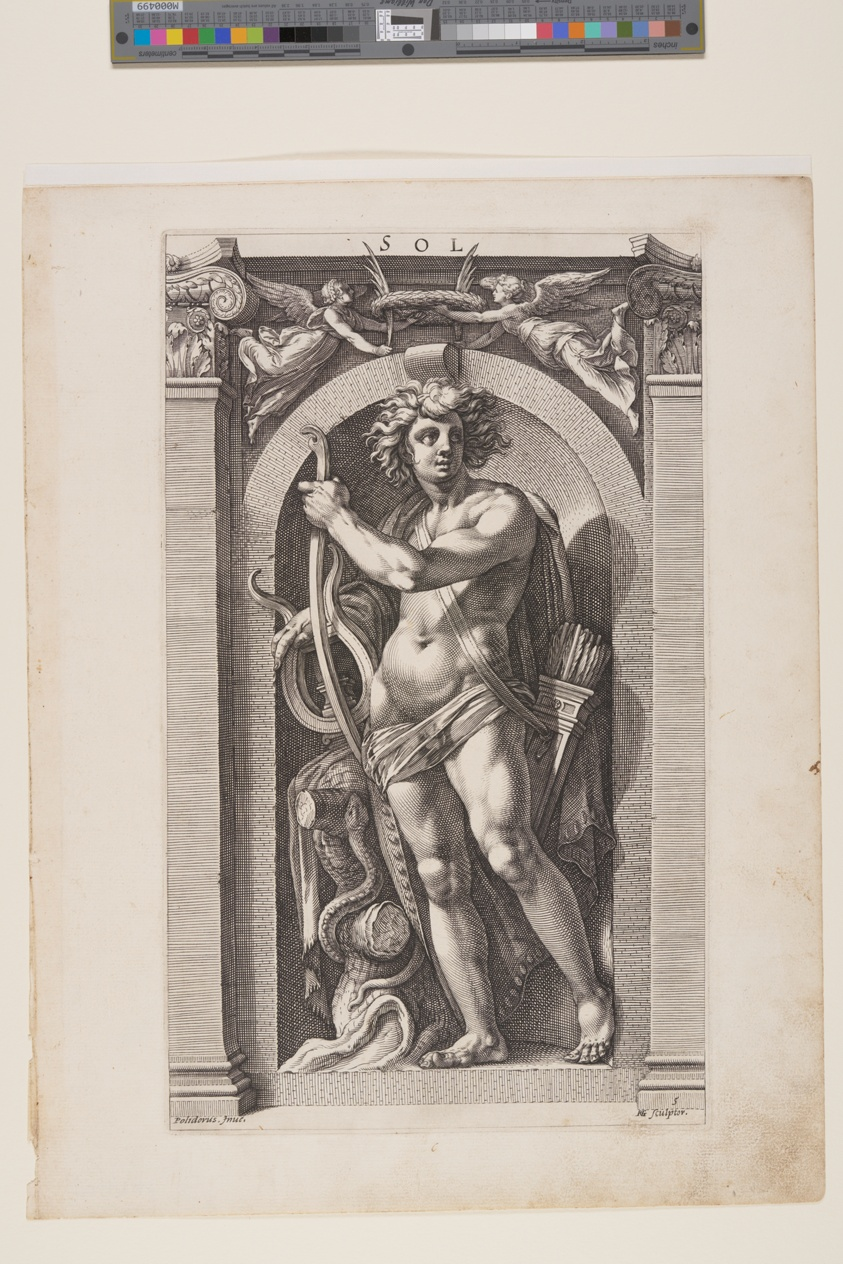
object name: Print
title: Sol, from Eight Pagan Gods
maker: Hendrick Goltzius (Dutch, 1558–1617); after Polidoro da Caravaggio (Italian, c. 1499–c. 1543)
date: 1592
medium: Engraving on ivory laid paper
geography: Netherlands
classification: print; paper; prints and drawing; engraving